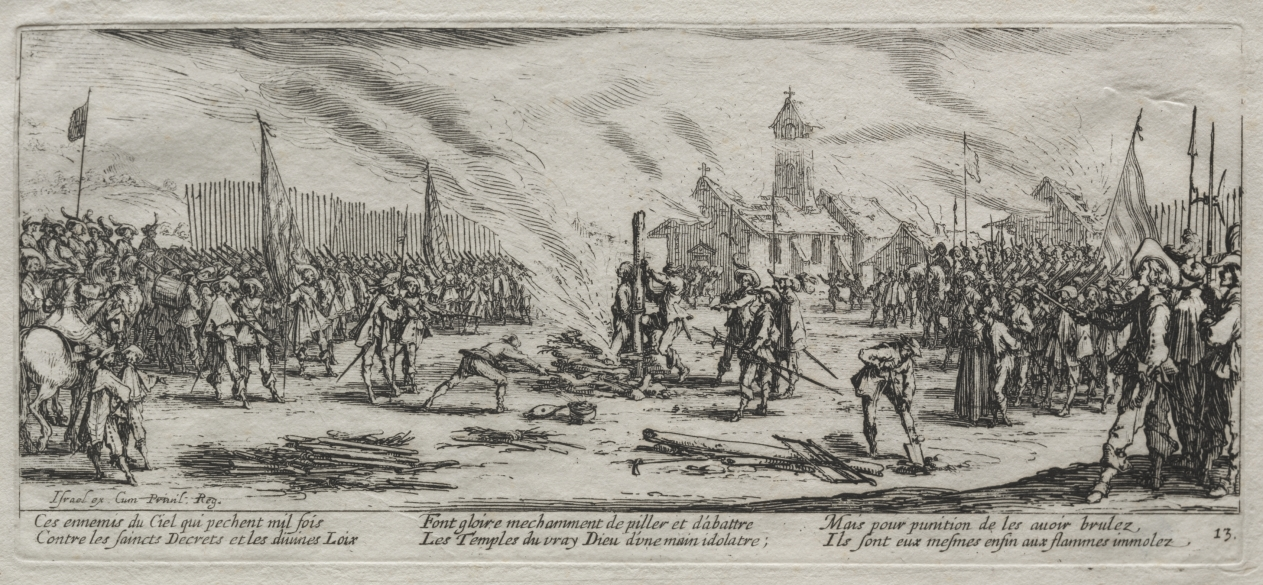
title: The Large Miseries of War: Burning at the Stake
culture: France, 17th century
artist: Jacques Callot (French, 1592–1635)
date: 1633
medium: etching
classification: Print